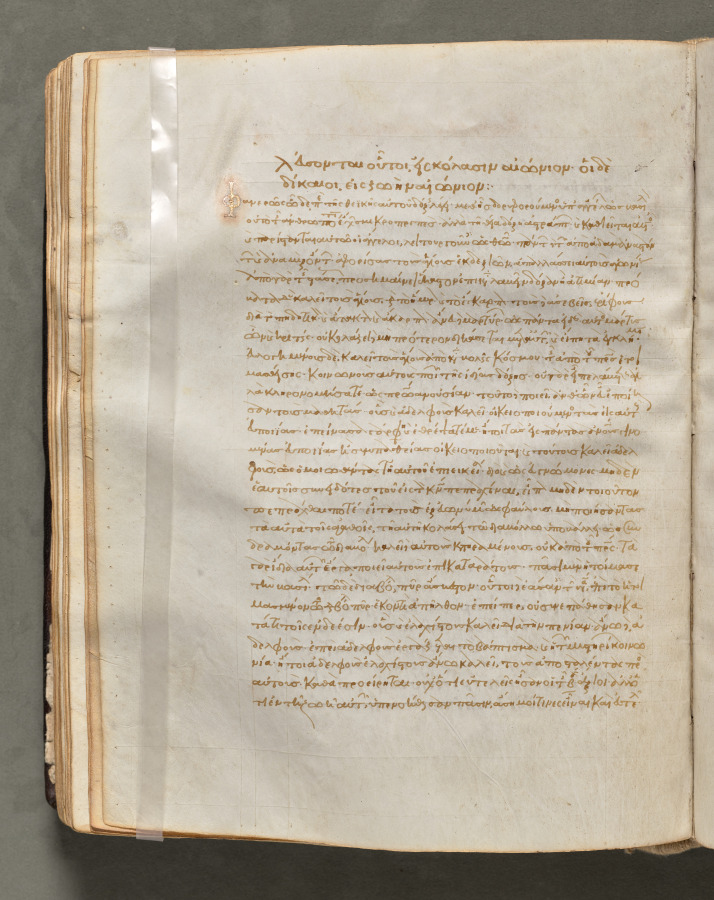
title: Text, folio 113 (verso), from a Gospel Book with Commentaries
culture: Byzantium, Constantinople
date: c. 1000–1100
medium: ink, tempera, and gold on vellum; leather binding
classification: Bound Volume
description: Each of the four gospels in this book opens on a page with brilliantly illuminated borders depicting the author of the text as well as birds-principally peacocks, symbols of the immortality of the soul-and fountains, representing the fountain of life and the salvation of the soul. This volume consists of 428 leaves with texts in Greek. Its level of sophistication suggests that it was probably written and decorated in a monastery in Constantinople.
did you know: Gospel Books were carried in procession through Byzantine churches.